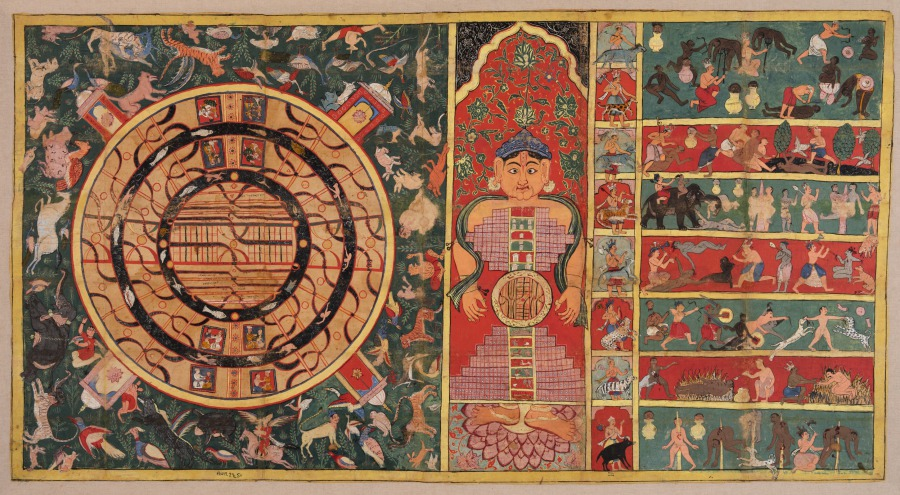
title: Diagrams of the Universe: The Two-and-a-Half Continents, the Universe in the Shape of a Person, and the Seven Levels of Hell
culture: Western India, Gujarat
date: 1613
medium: Gum tempera, ink, and gold on cloth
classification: Painting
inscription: saṃvat 1670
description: According to Jain cosmology, the universe is envisioned in the shape of a man. Above the waist are seven levels of heavens; below the waist are seven levels of hell. His midsection is the earthly realm, here shown as a round diagram with mountains and rivers, expanded at the left. The hell scenes are elaborated at the right.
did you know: The seven levels of hell depict various punishments as per Jain mythology.